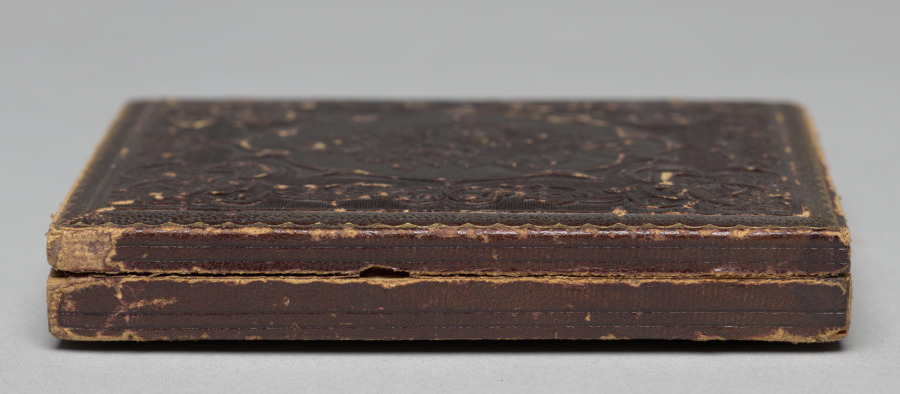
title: Three Carpenters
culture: America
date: c. 1858–65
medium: ambrotype, quarter plate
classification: Photograph